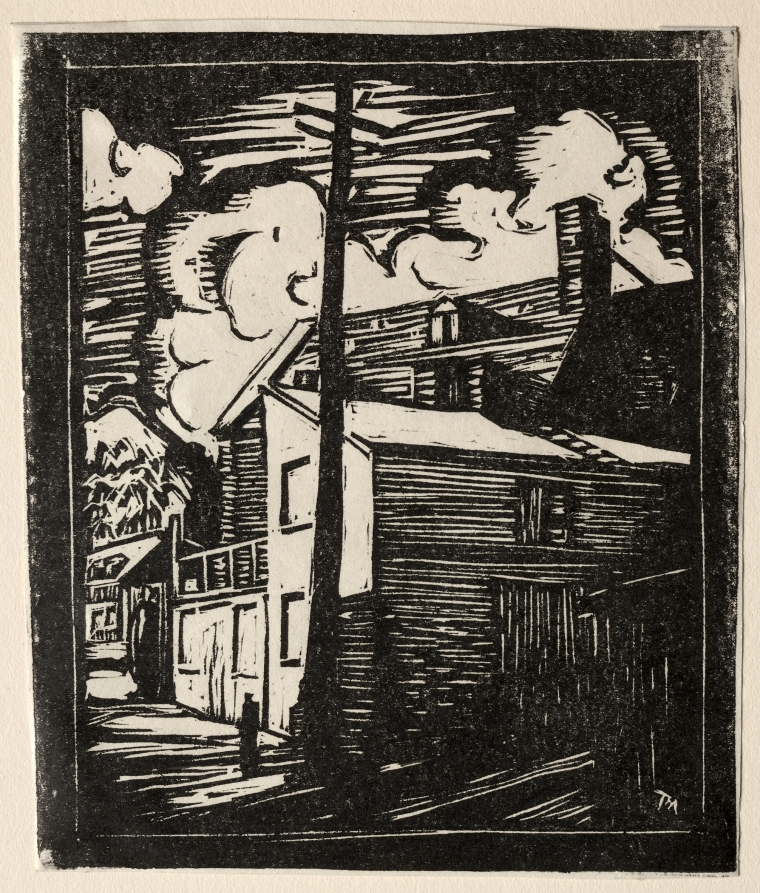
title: Quebec Buildings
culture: America, Ohio, Cleveland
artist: Thomas Morrison Marker (American, b. 1901)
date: 1929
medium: linoleum cut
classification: Print